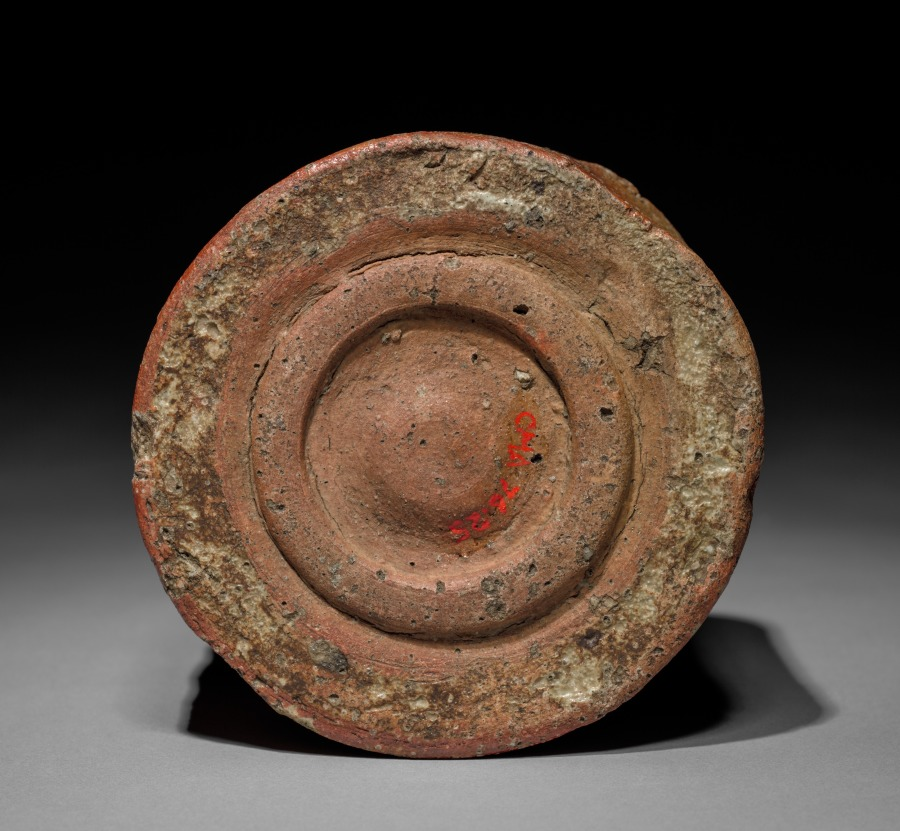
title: Tea Bowl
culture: Japan, Edo period (1615–1868)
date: 1600s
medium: stoneware with natural ash glaze (Shigaraki ware)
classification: Ceramic